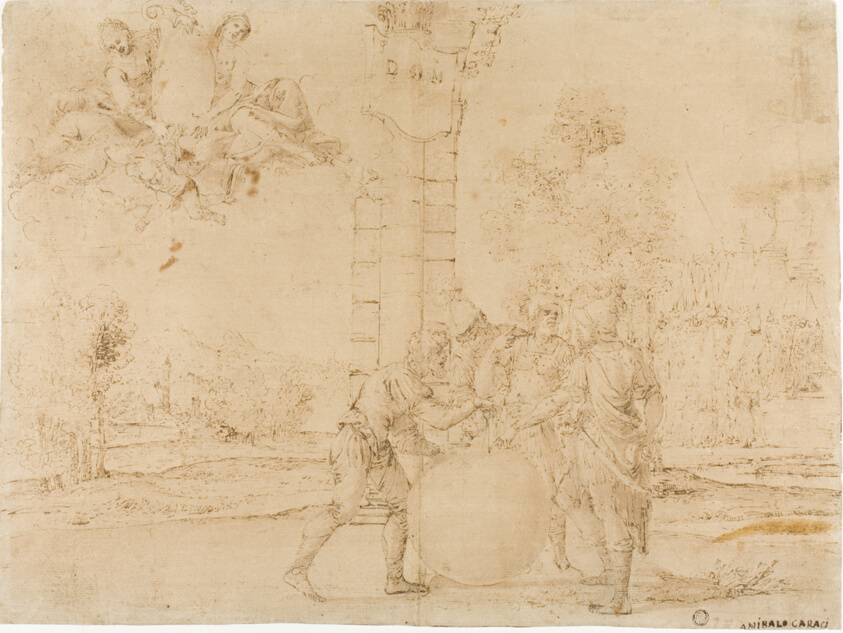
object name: Drawing and Watercolor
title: Octavian, Mark Antony, and Lepidus Dividing the Roman Empire, with Bologna in the Background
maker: Francesco Brizio (Italian, 1574-1623)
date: c. 1622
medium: Pen and brown ink, with brush and brown wash, on brown laid paper, laid down on cream laid card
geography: Italy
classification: pen and ink drawings; drawings (visual works); prints and drawing